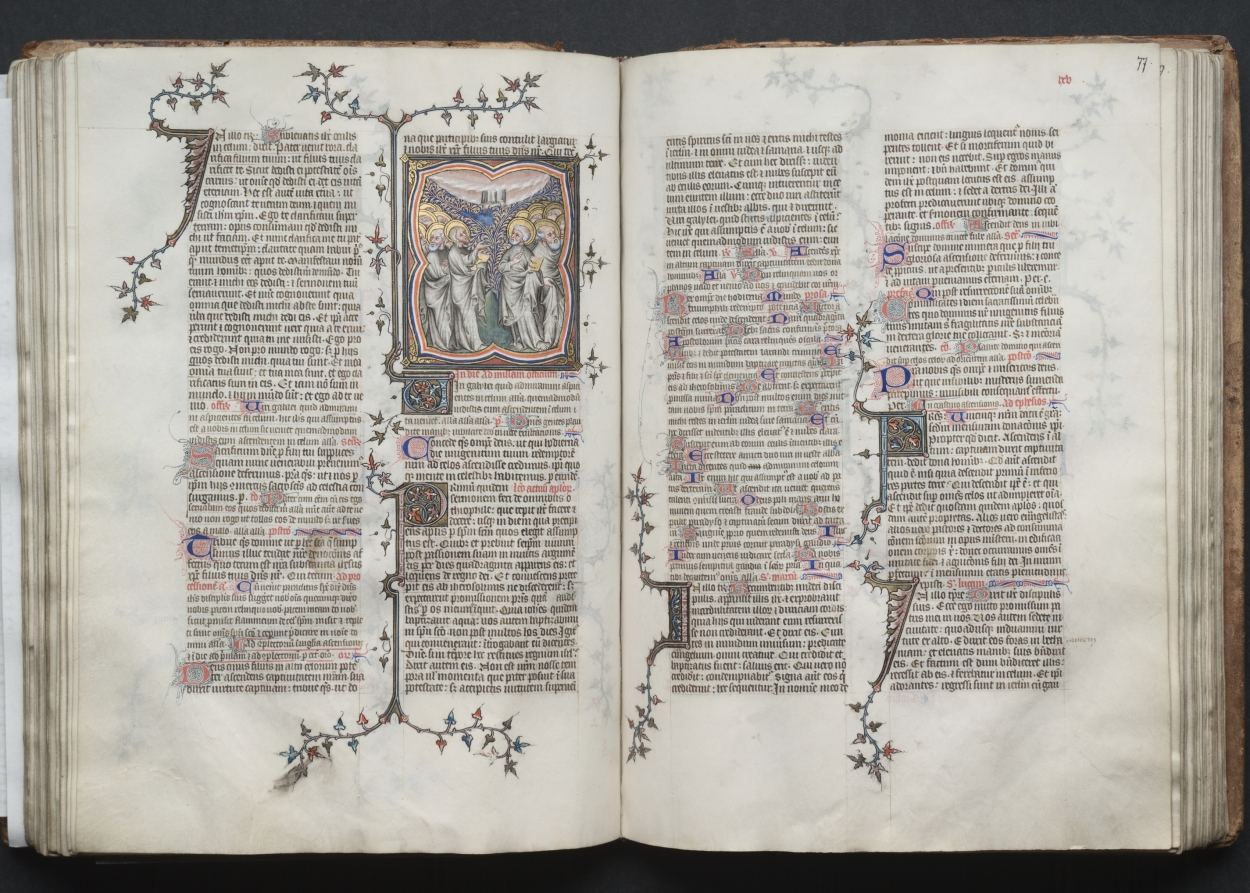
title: The Gotha Missal: Fol. 77r, Text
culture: France, Paris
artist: Master of the Boqueteaux (French)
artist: and Workshop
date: c. 1375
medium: ink, tempera, and gold on vellum; blind-tooled leather binding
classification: Bound Volume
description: The style and quality of this manuscript's decoration is typical of deluxe Parisian books made for aristocratic or royal patrons. Most of the book's decoration appears to be the work of the Master of the Boqueteaux, an artist active at the court of King Charles V (died 1380). His style was apparently shared by a number of book illuminators working in and around Paris. It is very possible that the Gotha Missal belonged to Charles V, but is not provable because the manuscript has no royal portraits and lacks a colophon. Given the book's magnificent decoration, however, it would seem that it was produced for a Valois prince, if not for the king himself. The manuscript receives its name from the German dukes of Gotha, its later owners.